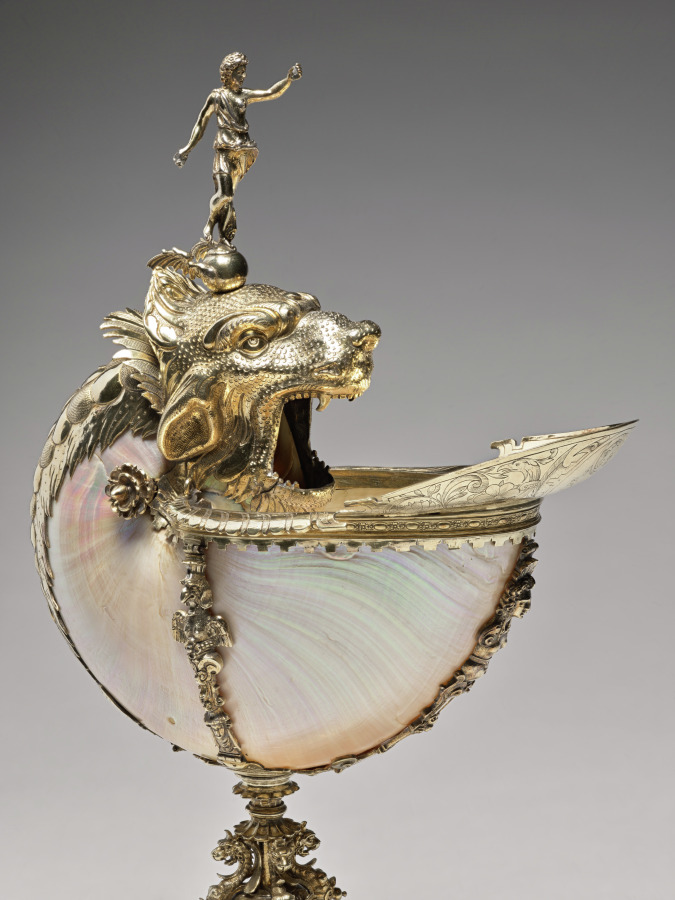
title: Nautilus Cup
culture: Netherlands, Holland, Delft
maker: Cornelis Jansz van der Burch (Dutch, active in Delft, d. 1615)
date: 1607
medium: Silver-gilt, nautilus shell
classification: Metalwork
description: Nautilus shells were brought to the Netherlands from Indonesia. Skilled Dutch silversmiths mounted them in silver, creating luxurious vessels that were sought after by wealthy collectors. Early Dutch nautilus cups are mainly associated with the city of Delft, although only a few other examples made in Delft are known from the late sixteenth and early seventeenth centuries. They feature the dramatic motif of a sea monster’s head.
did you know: The nautilus is a marine mollusk that swims by expelling water from its shell using jet propulsion.